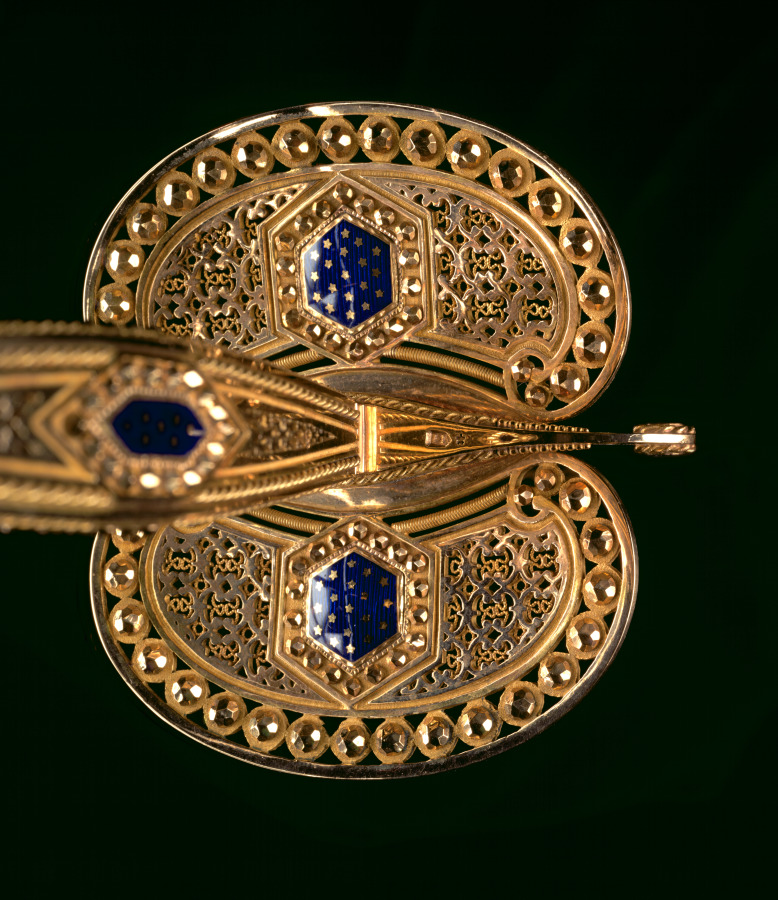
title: Small-Sword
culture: Switzerland, Geneva(?) (blade: Germany, Solingen, early 18th c.), late 18th Century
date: c. 1790–1800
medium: hilt: gold with blue translucent enamel; blade: etched, blued and gilded steel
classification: Arms and Armor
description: This example shows the small-sword at its latest and most refined stage of development. Though highly reflective of French taste, it was probably fashioned in a Swiss workshop under French influence or by a French craftsman working in Switzerland. Worn publicly as an emblem of social rank, this sword was likely custom-made for an affluent individual to use on formal or court occasions. So-called because of its short blade, the small-sword emerged as the light and quick weapon of choice for aristocratic civilians during the 1700s. Such a sword was traditionally suspended at about mid-thigh from the left side of a belt, the hilt exposed through the opening of the gentleman's coat. Highly visible, the hilt invited lavish decoration through precious materials such as gold and enamels, as seen here. Considered a type of masculine jewelry at that time, small-swords featured a variety of hilt styles that went in and out of fashion. Many were decorated to match personal costume, and jewelers worked on the finest small-swords of the day.